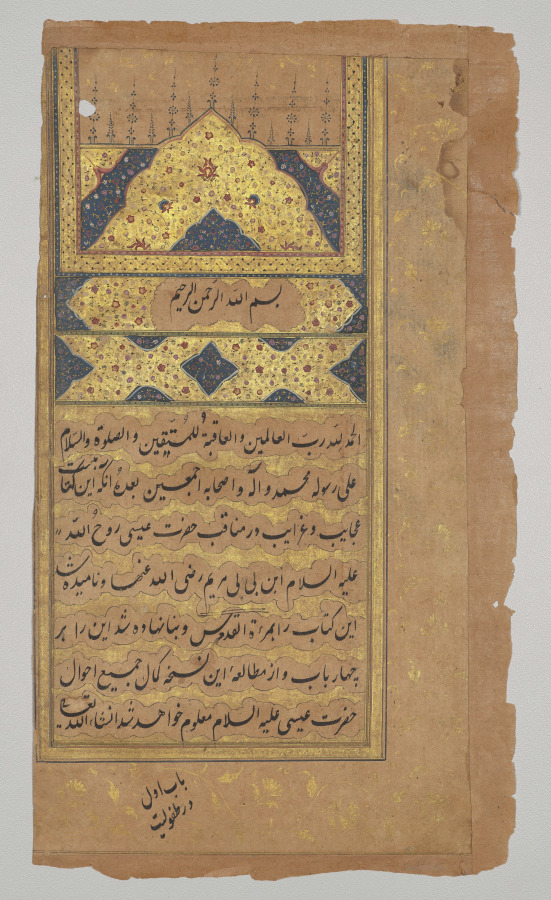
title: Illuminated opening page (folio 1 verso) and 131 folios with Persian text, from a Mirror of Holiness (Mir’at al-quds) of Father Jerome Xavier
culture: Mughal India, Allahabad, made for Prince Salim (1569–1627)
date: 1602–4; margins added with rebinding, about 1900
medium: Gum tempera, ink, and gold on paper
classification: Manuscript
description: The opening page of this Christian manuscript is ornamented in the manner of books made for elite Islamic patrons. Using costly pigments made from the semiprecious blue stone called lapis lazuli and gold paint, the artists created contrasting ground colors to set off delicate floral arabesques that evoke the waters and light of paradise. The text was written in Persian, the official court language of the Mughal rulers in India, and read from right to left. Father Jerome had studied Persian in India for seven to eight years before Akbar asked him to produce a history of the life of Jesus in Persian.